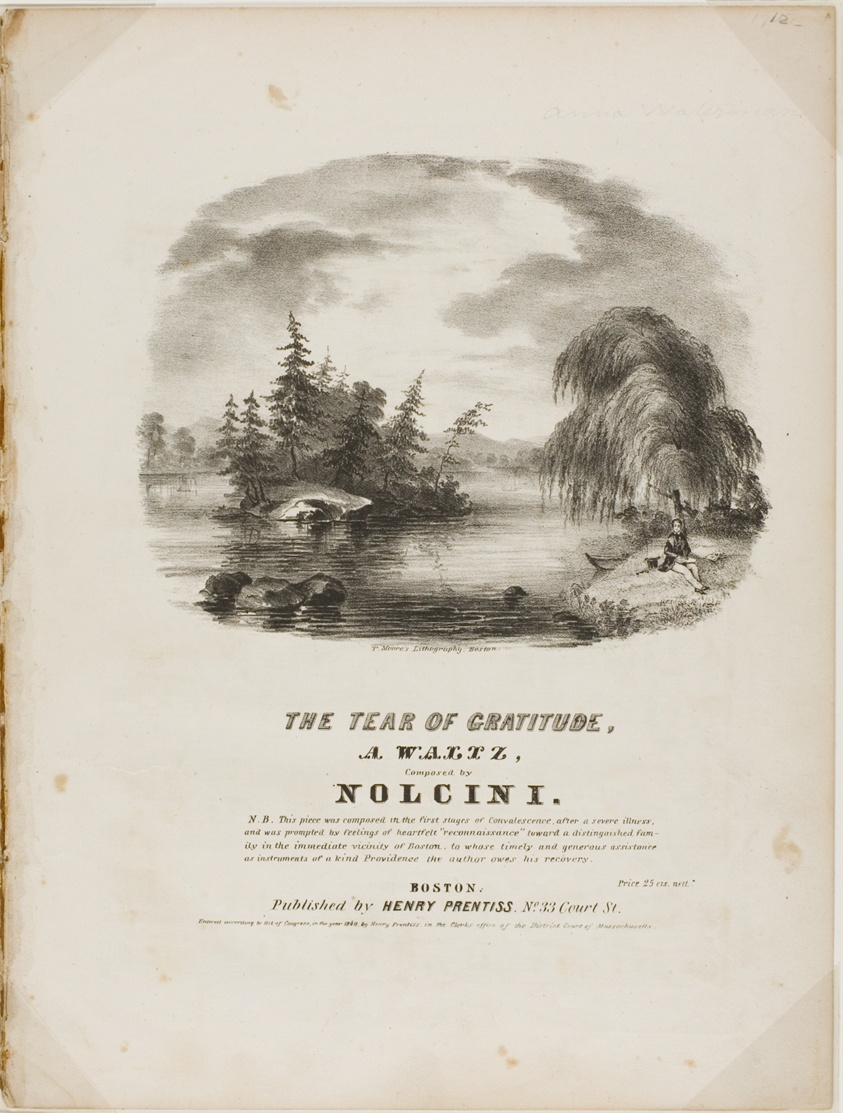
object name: Print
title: The Tear of Gratitude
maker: Thomas Moore (American, active 1834–1840s); published by Henry Prentiss (American, 1801–1859)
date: 1848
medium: Lithograph in black on ivory wove paper (two sheets sewn together, cover removed)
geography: United States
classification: lithograph; print; prints and drawing